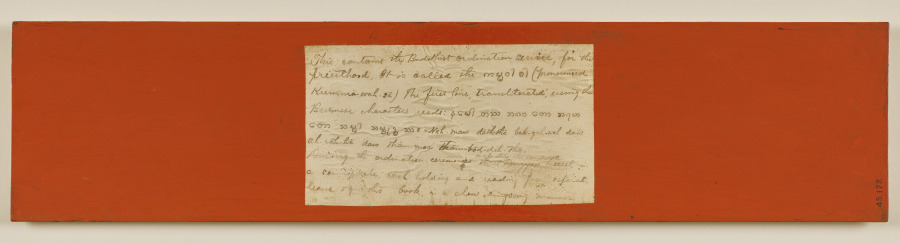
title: Kammavacha: Buddhist Ordination Text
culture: Myanmar (Burma)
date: 1800s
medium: Cover: lacquer, gilding, and glass appliqué on wood; leaves: lacquer and gilding on cloth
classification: Manuscript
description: In premodern Burma, lay people commissioned lavishly ornamented manuscripts for ceremonial occasions, when officiants would read aloud from the text. Written in black lacquer, the text is in the language of Pali written in a Burmese script. It contains ordination rites and procedures for monastic ceremonies. The second to last page is covered with intricately drawn, winged celestial beings (nats) in gestures of praise. They fly amid intertwining vegetation—denoting bounty—that grows from serpentine forms that refer to rain clouds. Lionlike forms inhabit the space with them. The top and bottom covers are equally ornamented with jeweled floral patterning.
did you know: The Pali text of this manuscript is written in Burmese square script, which is also known as "tamarind seed script."